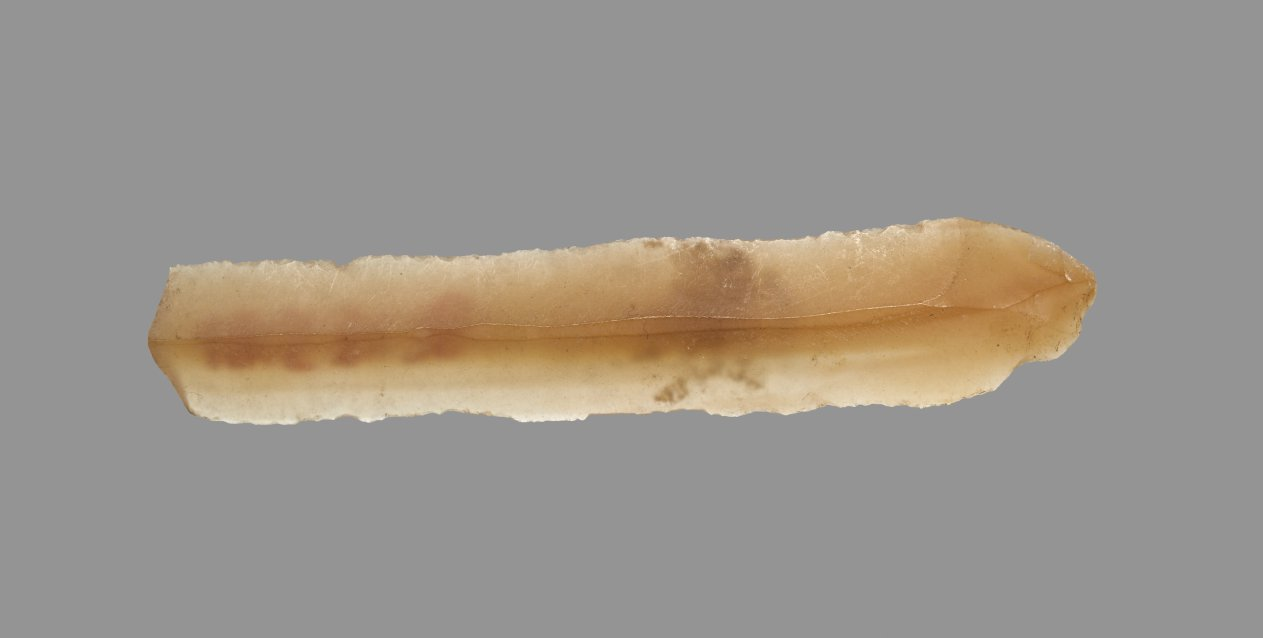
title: Sickle Blade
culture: Egypt, Middle Kingdom (2040–1648 BCE), Dynasty 12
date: 1980–1801 BCE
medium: flint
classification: Implements